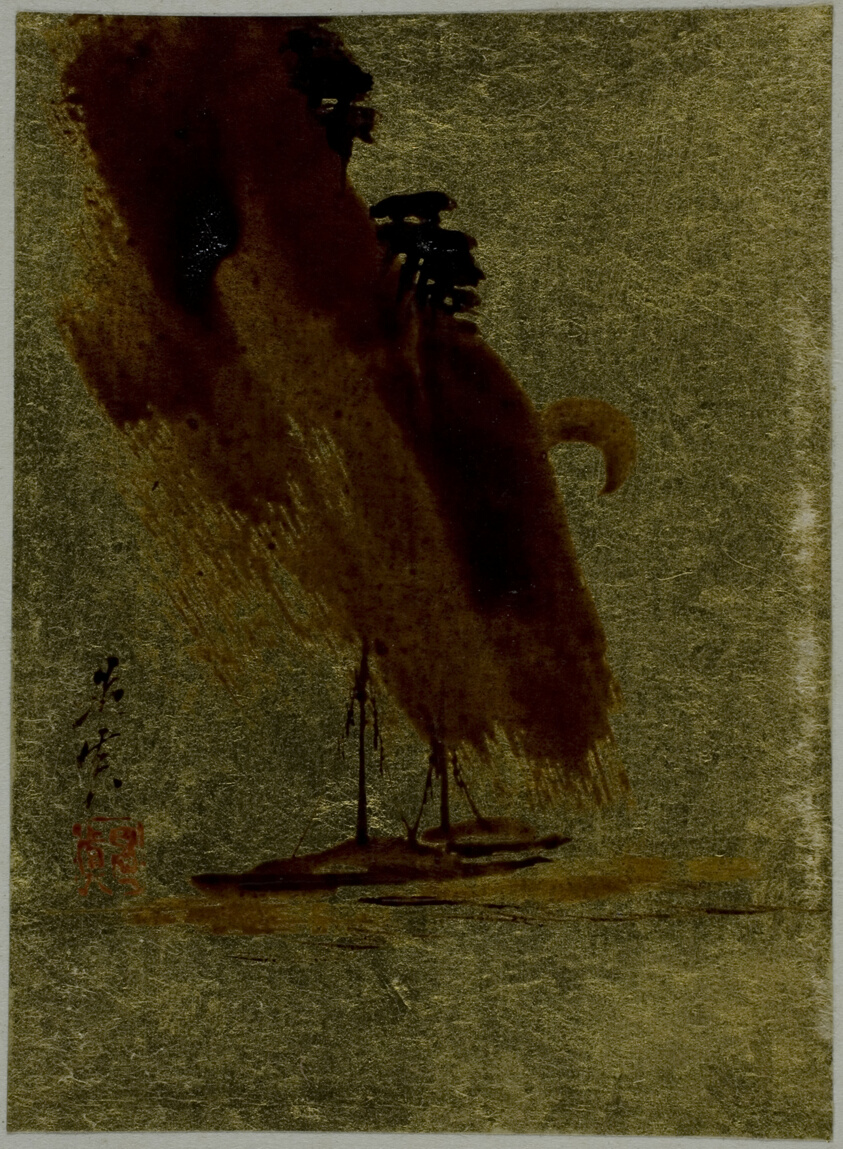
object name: Painting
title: Boats near Hillside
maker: Shibata Zeshin (Japanese, 1807-1891)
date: Meiji period (1868–1912)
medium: Album leaf, inks and color on paper.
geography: Japan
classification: album leaf; album/sketchbook; asian art; painting